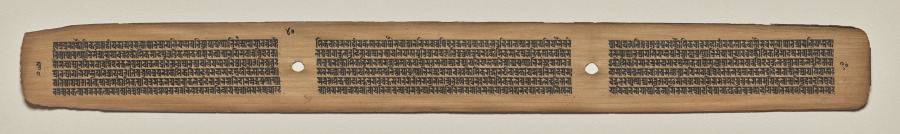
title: Text, Folio 40 (verso), from a Manuscript of the Perfection of Wisdom in Eight Thousand Lines (Ashtasahasrika Prajnaparamita-sutra)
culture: Eastern India, Bihar, Vikramashila Monastery. Painting: Nepal, Kathmandu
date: Sunday, September 14, 1119 (year 239 of the Newar Samvat in the month of Ashvina)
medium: gum tempera and ink on palm leaves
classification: Painting